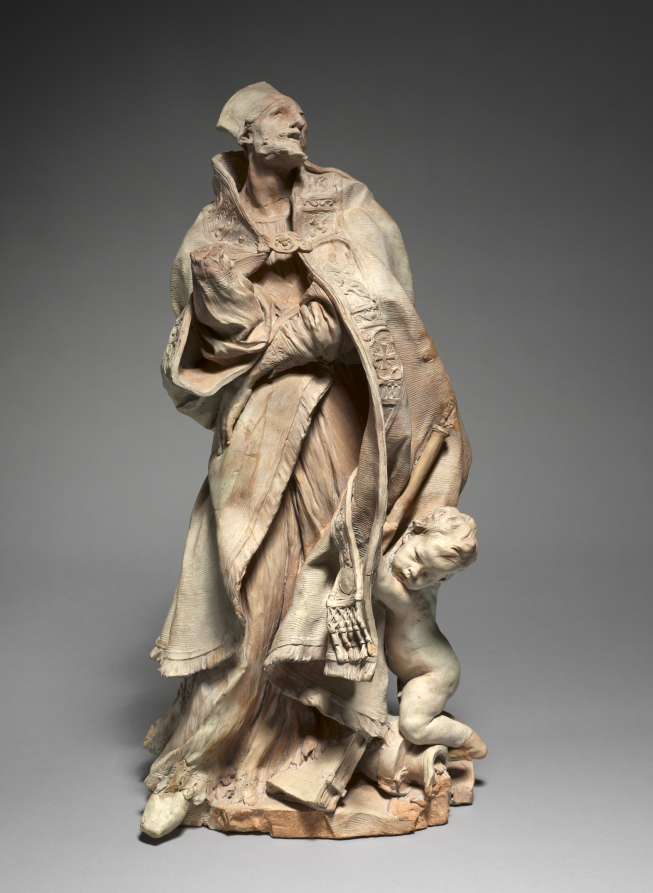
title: Study for The Blessed Alessandro Sauli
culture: France, made in Genoa, 17th century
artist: Pierre Puget (French, 1620–1694)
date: 1663–1668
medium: terracotta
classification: Sculpture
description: A famous preacher from an aristocratic family in Genoa, Sauli (1534-1591) spearheaded important Catholic reforms, including popular missions and restructuring the church to reach a broader spectrum of worshippers. This sculpture is a model for a large statue commissioned by the Sauli family for a Genoese church. Although the open book speaks to Sauli’s work as a reformer, his twisting body and facial expression indicate utter absorption in a deeply personal vision.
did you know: Terracotta models, like this study for a sculpture, are also known as bozzetti or modelli.